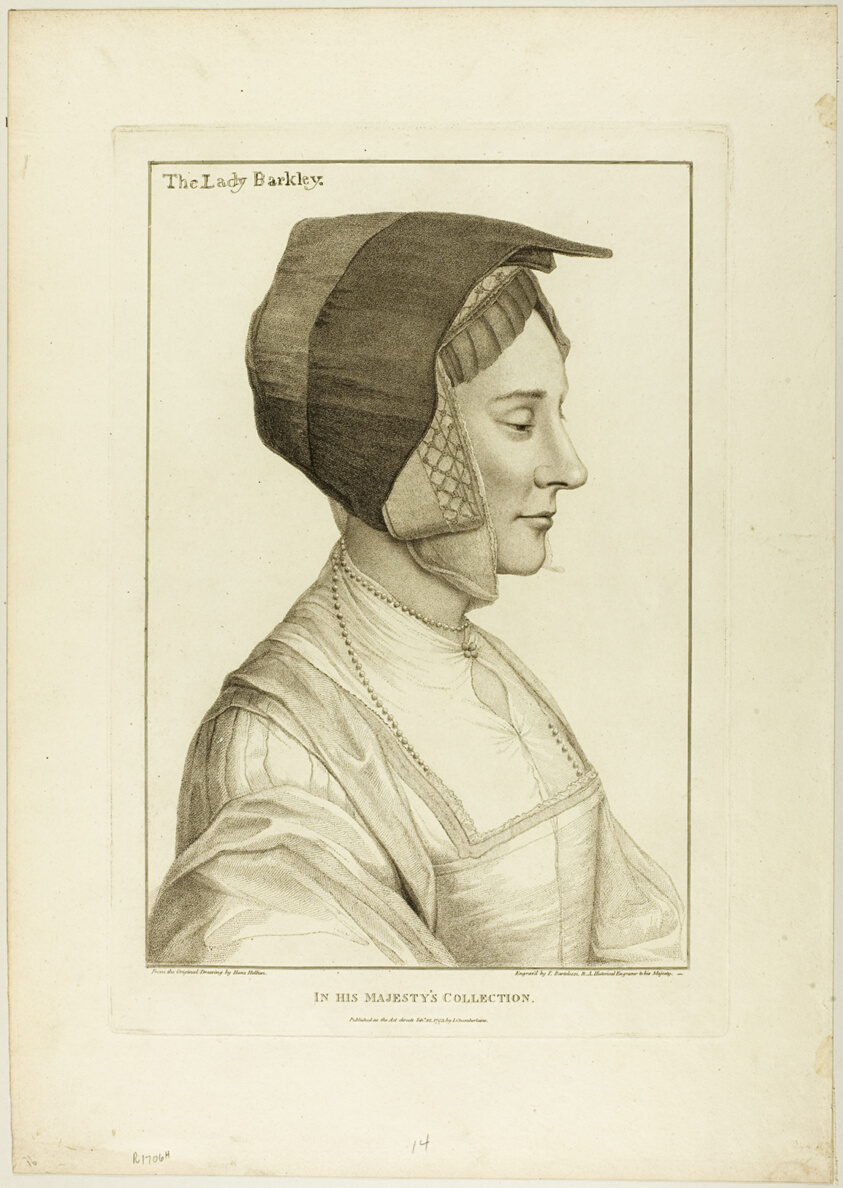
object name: Print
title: Lady Barkley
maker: Francesco Bartolozzi (Italian, 1727-1815); after Hans Holbein the younger (German, 1497-1543)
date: September 22, 1795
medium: Stipple engraving on cream wove paper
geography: Italy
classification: engraving; print; prints and drawing